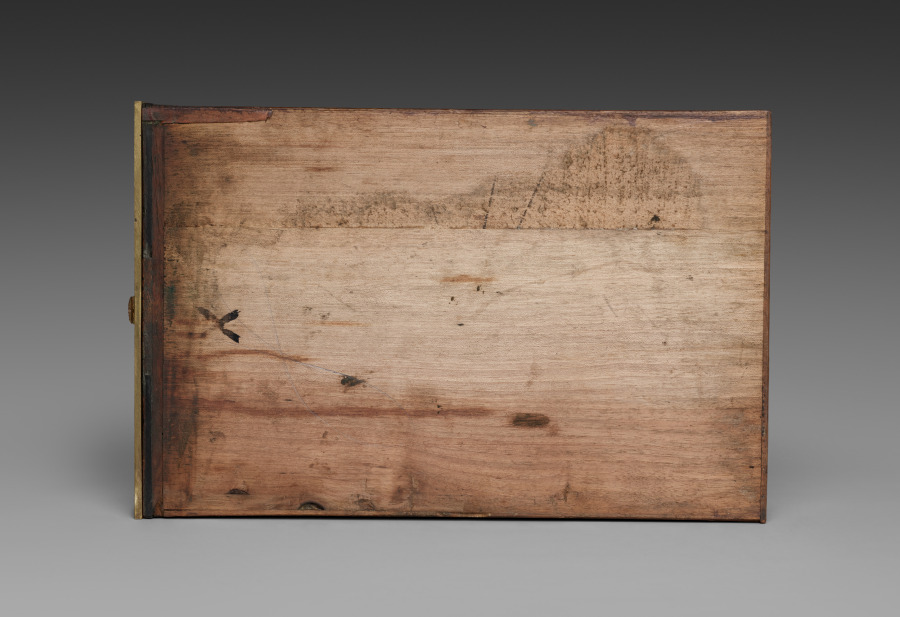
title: Side Drawer for Cabinet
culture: France, late 17th Century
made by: André-Charles Boulle (French, 1642–1732)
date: c. 1690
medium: ebony, marquetry in metal and tortoise shell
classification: Furniture and woodwork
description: Appointed cabinetmaker to King Louis XIV in 1672, André-Charles Boulle became a master of furniture making in France during the late 1600s until his death in 1732. Known primarily for his use of marquetry, in which metal patterns are inlaid into tortoiseshell then applied within the veneered surface of the furniture, Boulle established a level of quality and craftsmanship few others could achieve. As a result, his work found favor at the royal court and among other aristocrats and diplomats eager to impress the king. The inclusion of a medallion depicting Louis XIV within the bronze decoration of this chest would have identified the owner with the royal court. Often exhibiting stout architectural proportions with elegant groups of inlaid motifs such as the parrot on the central panel of this chest, Boulle’s designs are an example of the intellectual fashion for contrasting ideas, materials, and motifs.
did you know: Originally designed to sit atop an elaborate tall stand, this chest was likely altered in the late 1700s to reduce its scale and height.